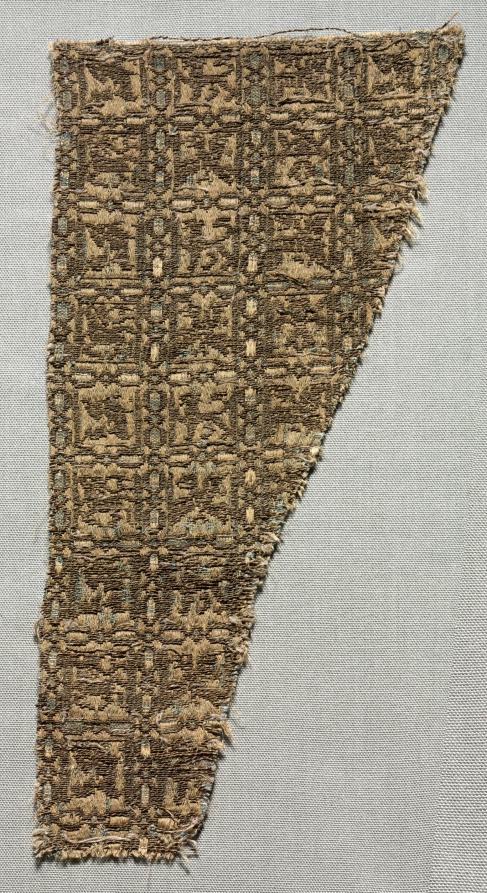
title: Lampas with animals in squares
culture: probably Iran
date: late 1200s - 1300s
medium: lampas and taqueté: silk and metal thread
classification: Textile